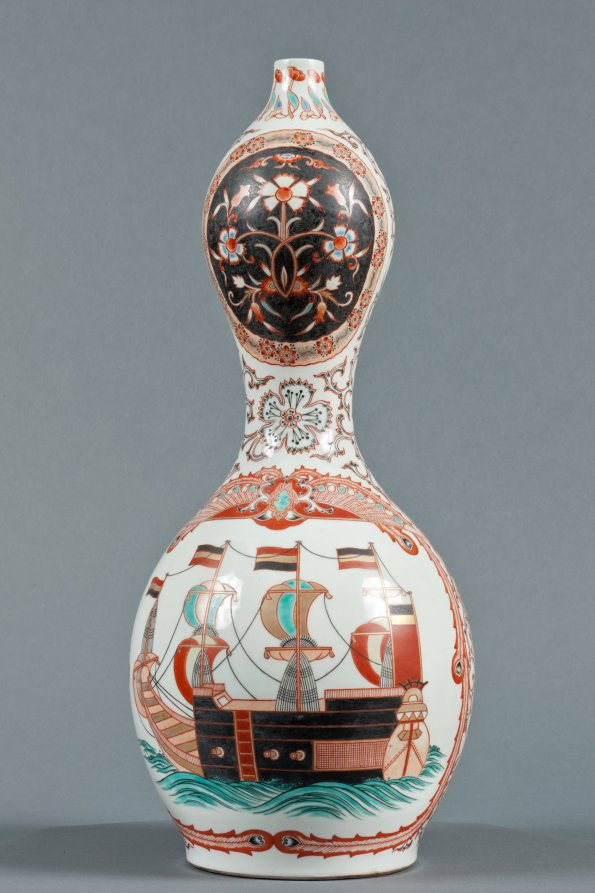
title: Bottle with Western Ships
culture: Japan, Edo period (1615–1868)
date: c. 1800–1868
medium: Porcelain with decoration in colored enamels and underglaze blue, overglaze enamels, and gold (Hizen ware, Arita type)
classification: Ceramic